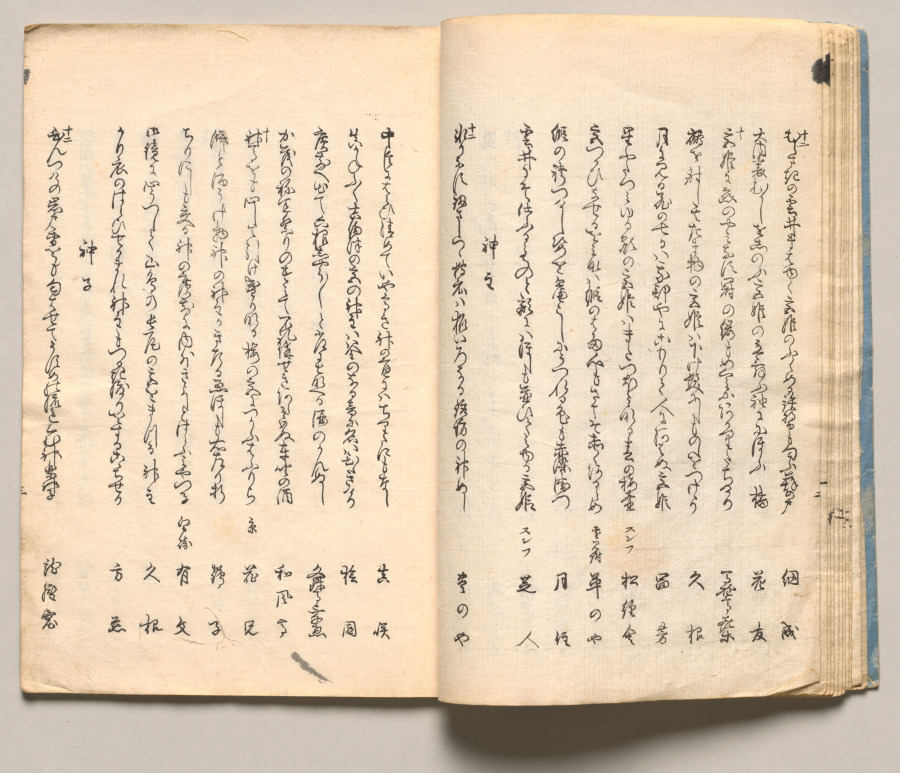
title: Spread Eleven from Volume One of People of Japan in Light Verse (Kyōka)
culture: Japan, Edo period (1615–1868)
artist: Utagawa Hiroshige (Japanese, 1797–1858)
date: 1857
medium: Woodblock-printed book; ink and color on paper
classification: Bound Volume